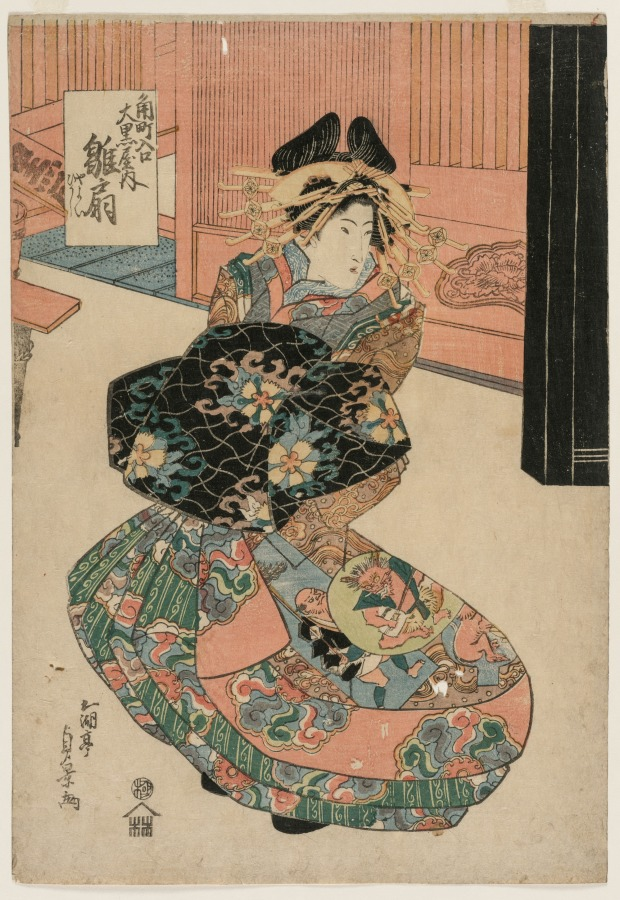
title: The Courtesan Hinaogi of the Daikokuya at the Entrance of Kadomachi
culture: Japan, Edo period (1615–1868)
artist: Utagawa Sadakage (Japanese)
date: c. late 1820s or early 1830s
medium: print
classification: Print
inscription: Signature: Gochotei Sadakage ga Publisher: Iseya Rihei (emblem) Censorship Seal: kiwame